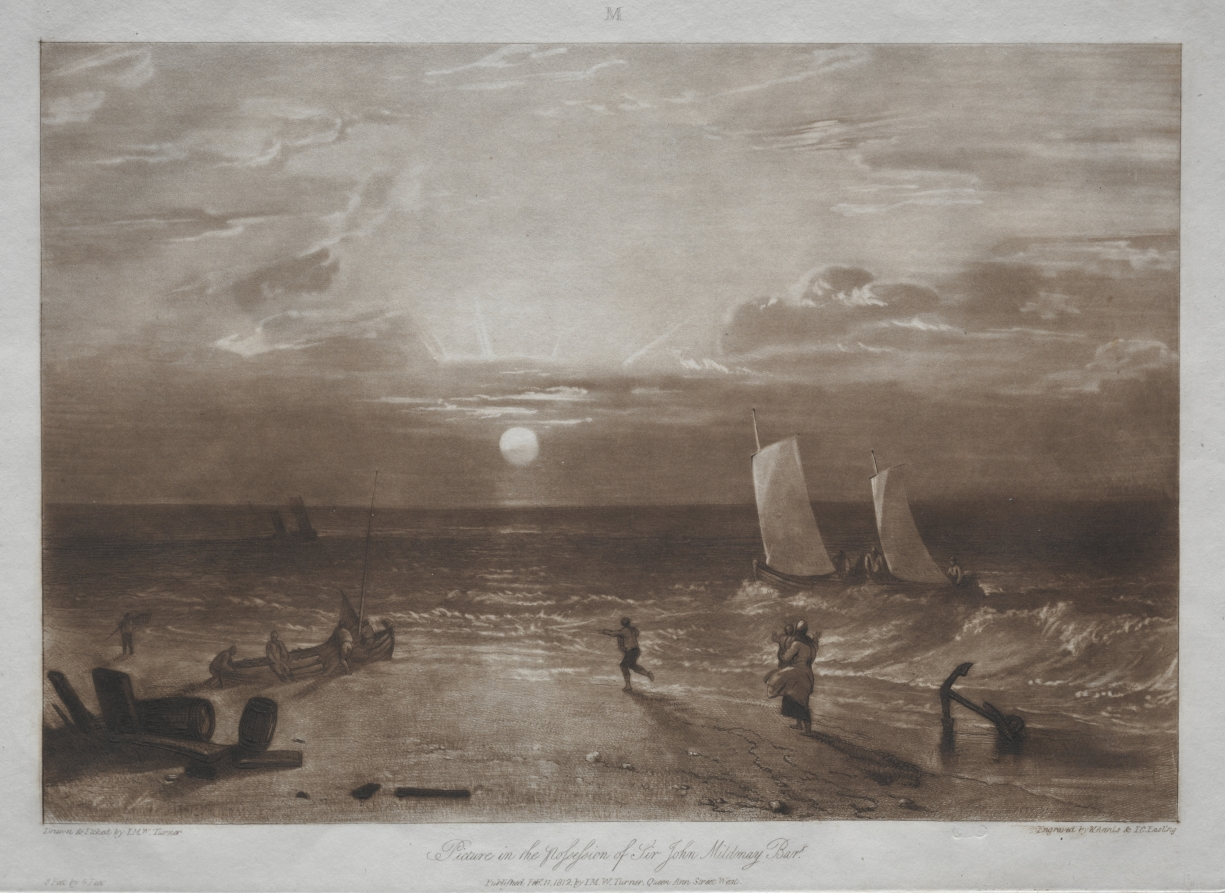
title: Liber Studiorum: Mildmay Sea-piece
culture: England, 19th century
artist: Joseph Mallord William Turner (British, 1775–1851)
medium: etching and mezzotint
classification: Print